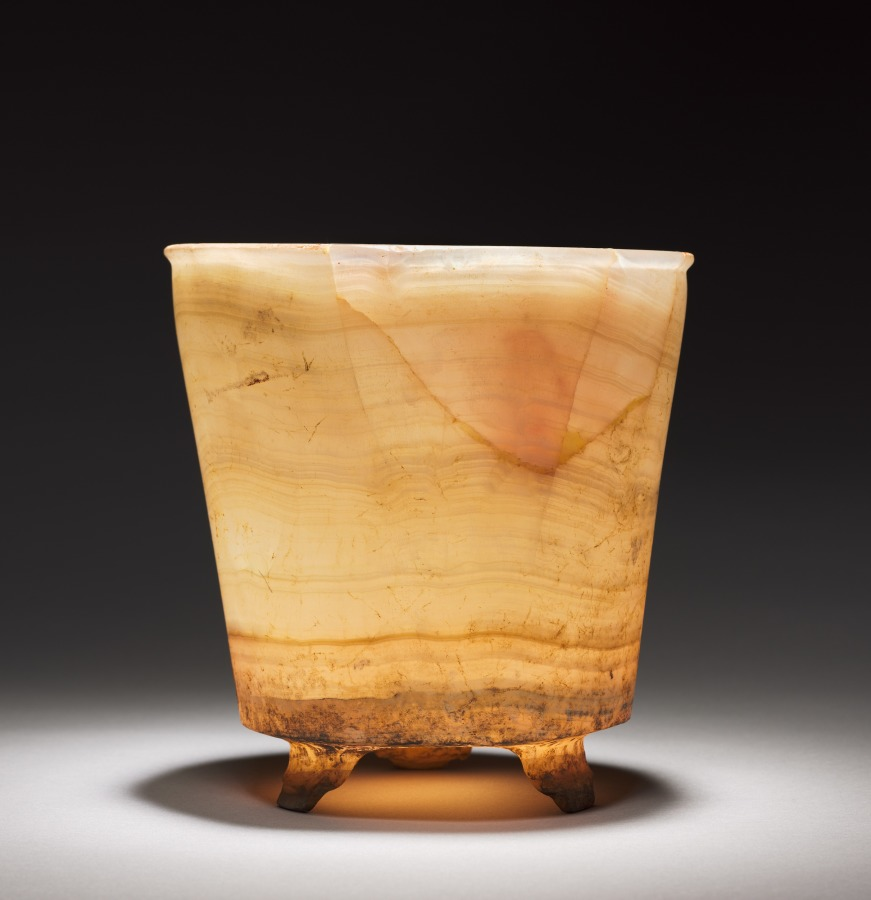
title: Offering Group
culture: Mexico, Guerrero(?), San Jerónimo de Juárez, Xochicalco style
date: c. 800–1200(?)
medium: travertine or tecali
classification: Sculpture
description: The objects in this group, all with traces of red pigment, are said to have been found together, the shells and greenstone plaque inside the translucent stone vessel. A similar offering was found in a pyramid ornamented with feathered serpents at Xochicalco, a site south of the Valley of Mexico.